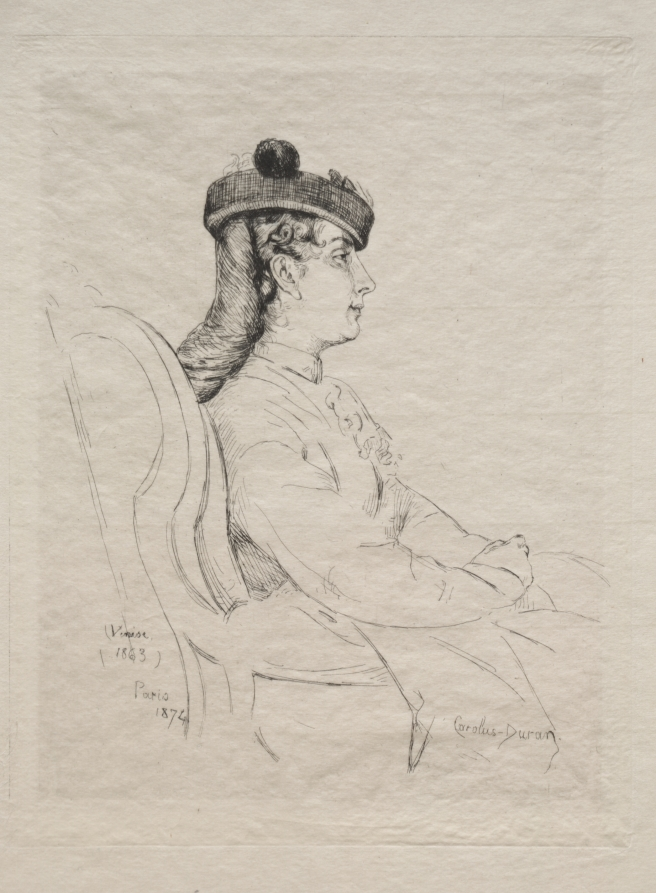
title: Souvenir de Voyage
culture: France, 19th century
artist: Emile Auguste Carolus-Duran (French, c. 1837–1917)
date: 1874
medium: etching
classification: Print